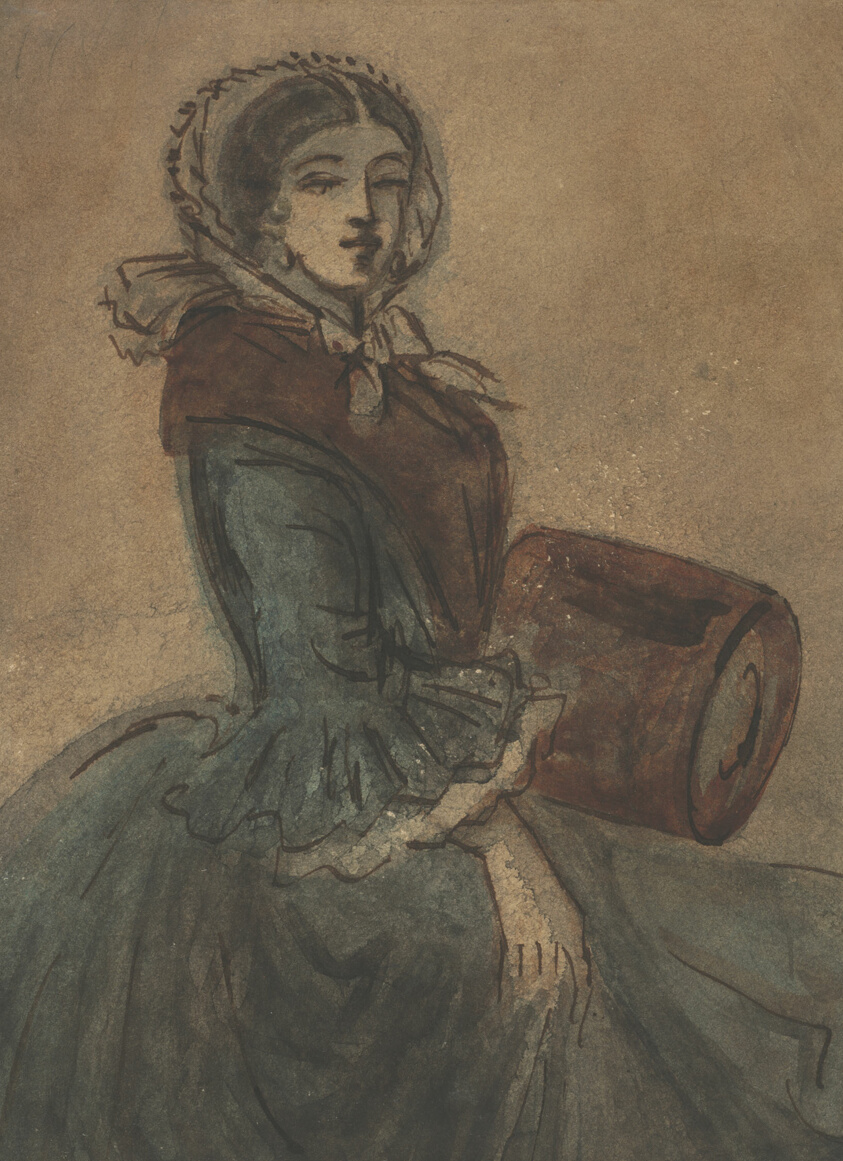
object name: Drawing and Watercolor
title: Woman with a Muff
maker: Constantin Guys (French, 1802-1892)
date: c. 1860–1864 (?)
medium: Pen and brown ink with brush and watercolor, over traces of graphite, on cream wove card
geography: France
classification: watercolor; drawings (visual works); prints and drawing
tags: Century of Progress, world's fairs, Chicago World's Fairs